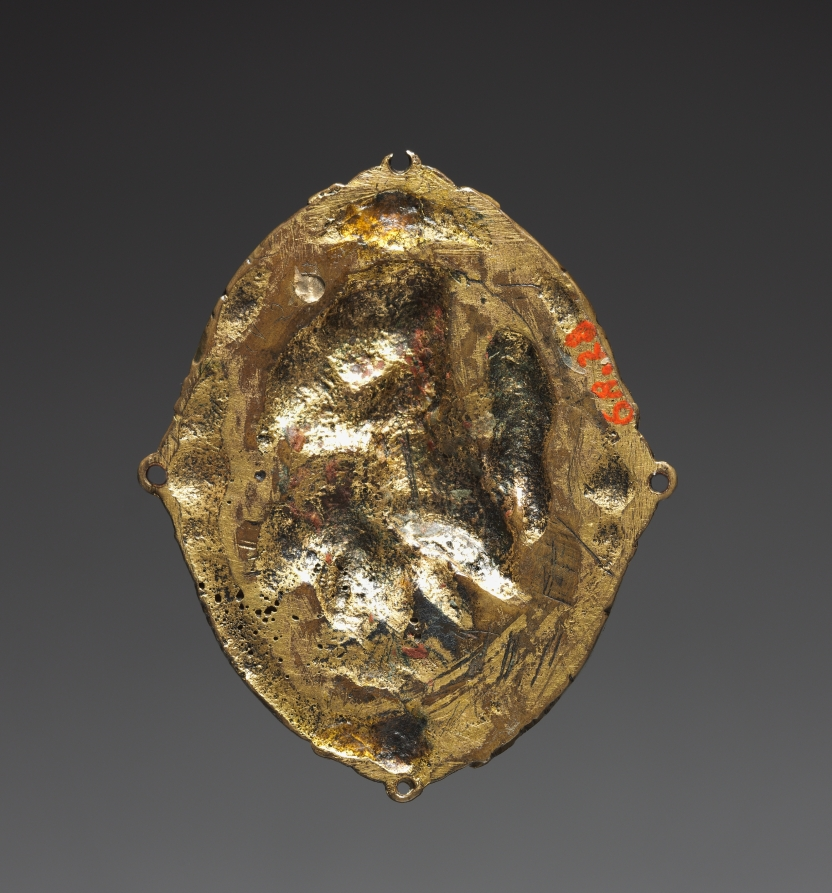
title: Jupiter and Juno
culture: Germany, late 16th century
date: late 1500s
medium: gilt bronze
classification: Sculpture